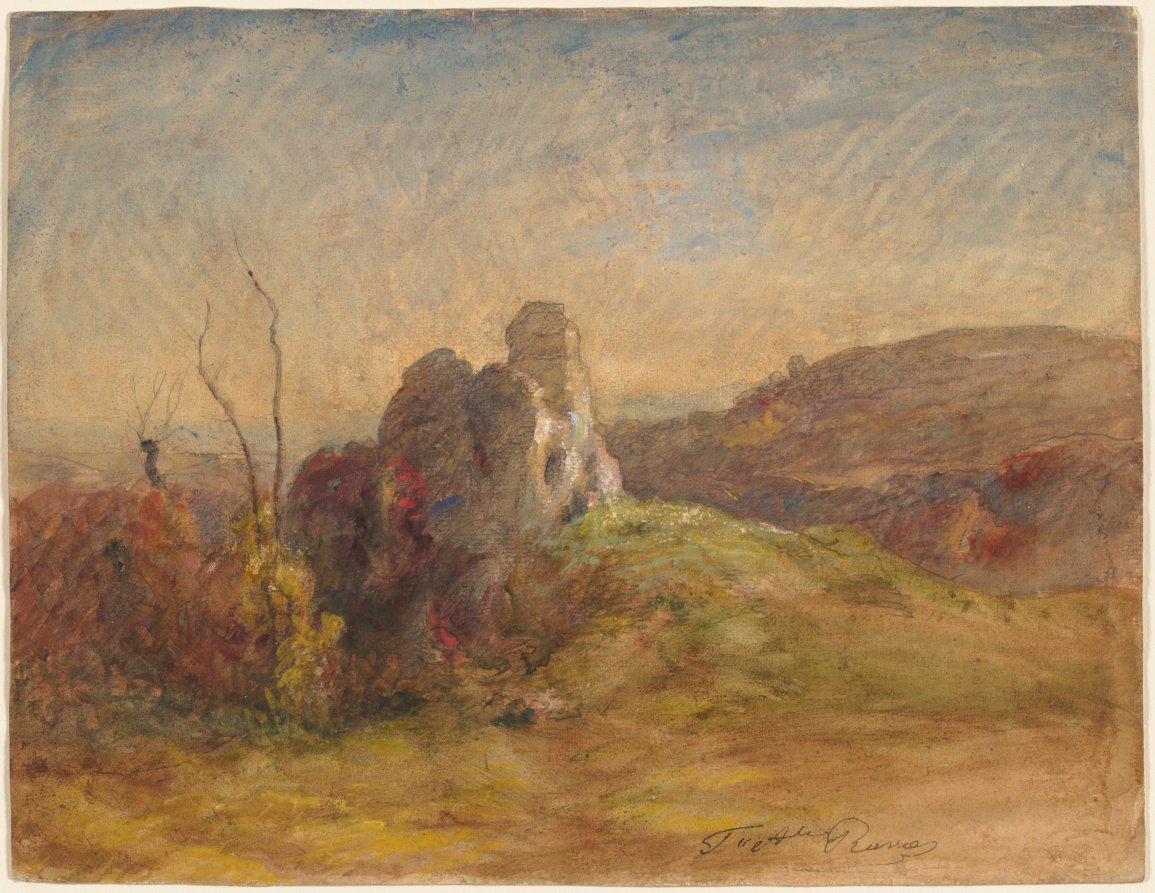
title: Landscape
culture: France, 19th century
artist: François-Auguste Ravier (French, 1814–1895)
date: 1870–84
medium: watercolor and gouache with graphite and traces of black chalk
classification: Drawing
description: François-Auguste Ravier was initially influenced by the Barbizon tradition, but as he matured, his work became increasingly subjective and expressive. This highly worked drawing depicts the landscape around Morestel, near the artist’s native Lyon. Rather than focusing on cultivated fields of the region, Ravier preferred isolated ponds, woods, and plains that convey a poignant sense of his solitude and detachment from the Parisian art world. Ravier’s watercolors were carefully considered studio works, distillations of remembered experiences in nature. In his writing, Ravier spoke of how the most beautiful landscapes of all were those in his dreams.